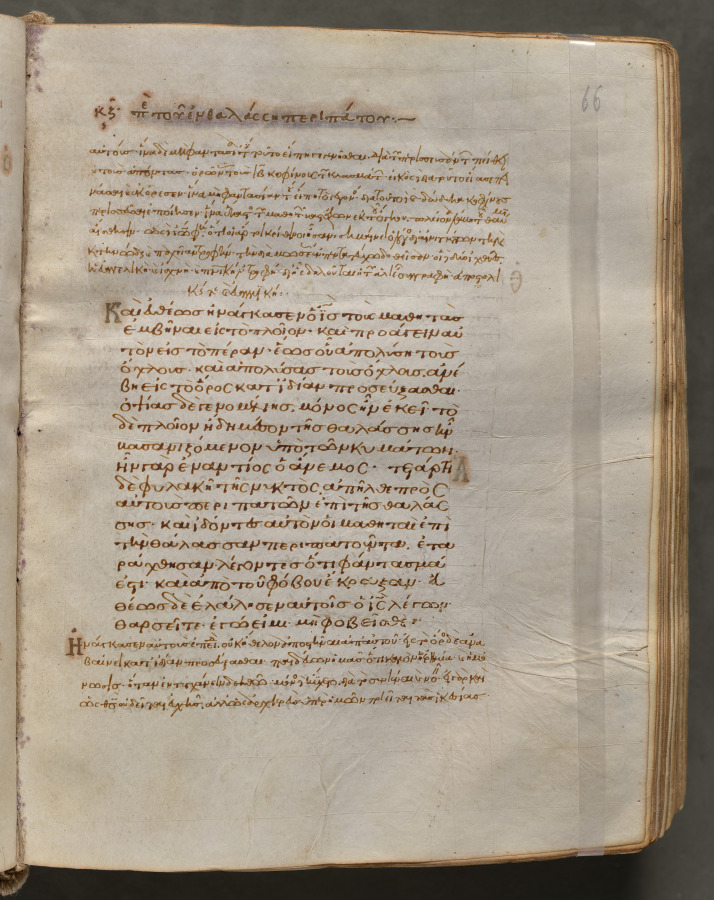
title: Text, folio 66 (recto), from a Gospel Book with Commentaries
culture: Byzantium, Constantinople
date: c. 1000–1100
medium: ink, tempera, and gold on vellum; leather binding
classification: Bound Volume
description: Each of the four gospels in this book opens on a page with brilliantly illuminated borders depicting the author of the text as well as birds-principally peacocks, symbols of the immortality of the soul-and fountains, representing the fountain of life and the salvation of the soul. This volume consists of 428 leaves with texts in Greek. Its level of sophistication suggests that it was probably written and decorated in a monastery in Constantinople.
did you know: Gospel Books were carried in procession through Byzantine churches.